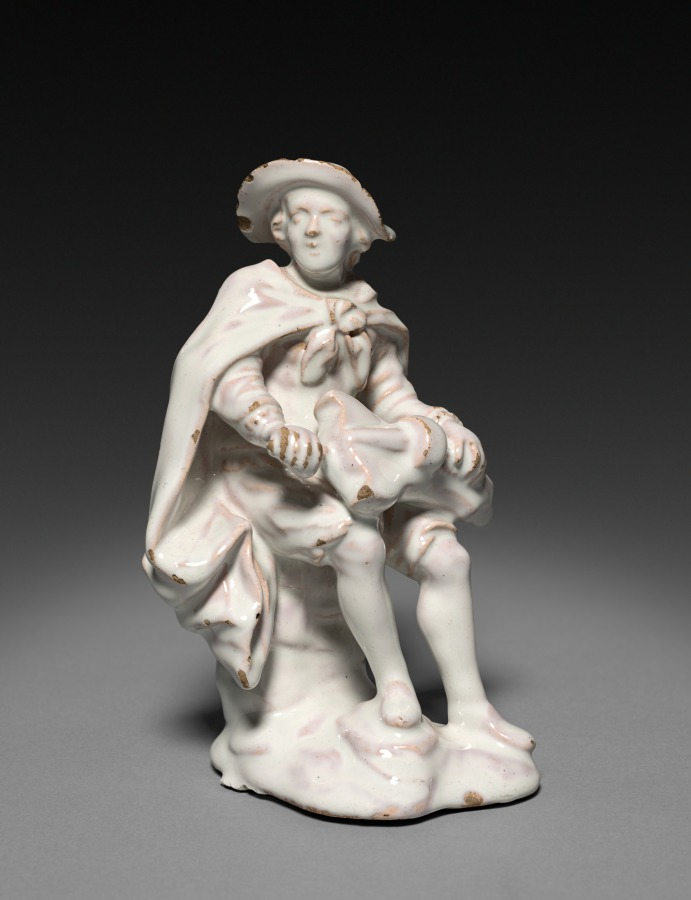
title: Seated Musician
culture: France, Strasbourg, 18th century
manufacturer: Strasbourg Factory (France)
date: c. 1740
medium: faience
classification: Ceramic